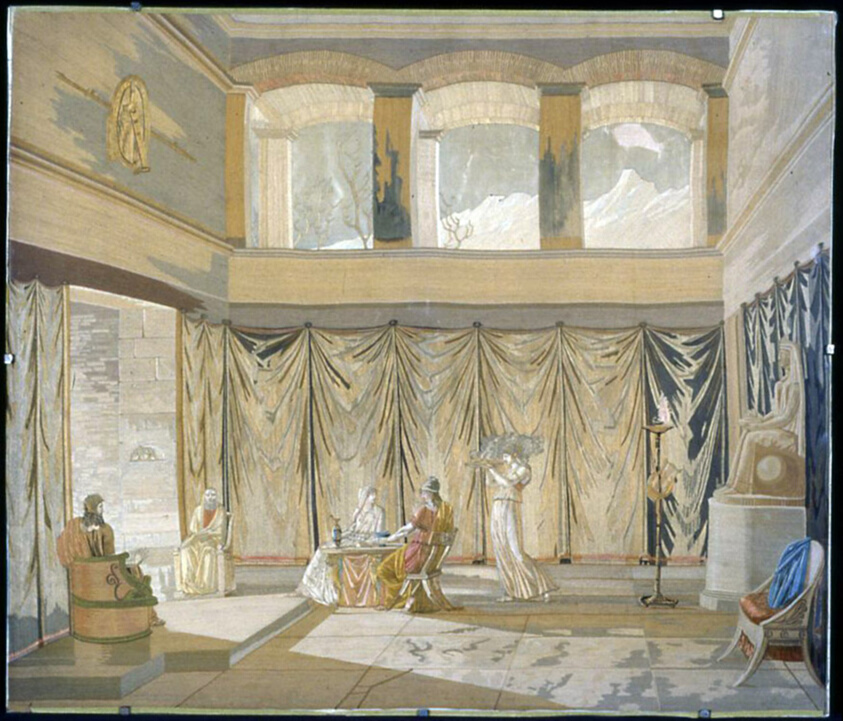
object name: Textile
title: L'Hiver (Winter)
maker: After Antoine-Pierre Mongin (French, 1761-1827); Possibly produced by Camille Pernon et Cie.; France, Lyon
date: Early 19th century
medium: Silk, warp-float faced satin weave; embroidered with silk and chenille yarns in chain and satin stitches; couching; surface pigment added to embroidered stitches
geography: France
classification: textile; needlework (visual works)